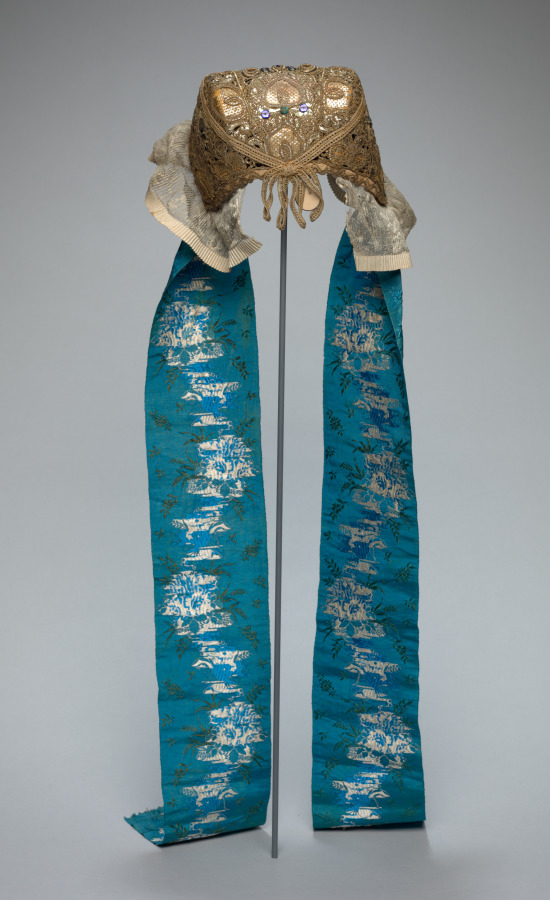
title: Headdress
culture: Germany, Buckeburg, 18th century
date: 1700s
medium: embroidery, gold thread; decorated with gold lace and streamers of moiré ribbon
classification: Garment